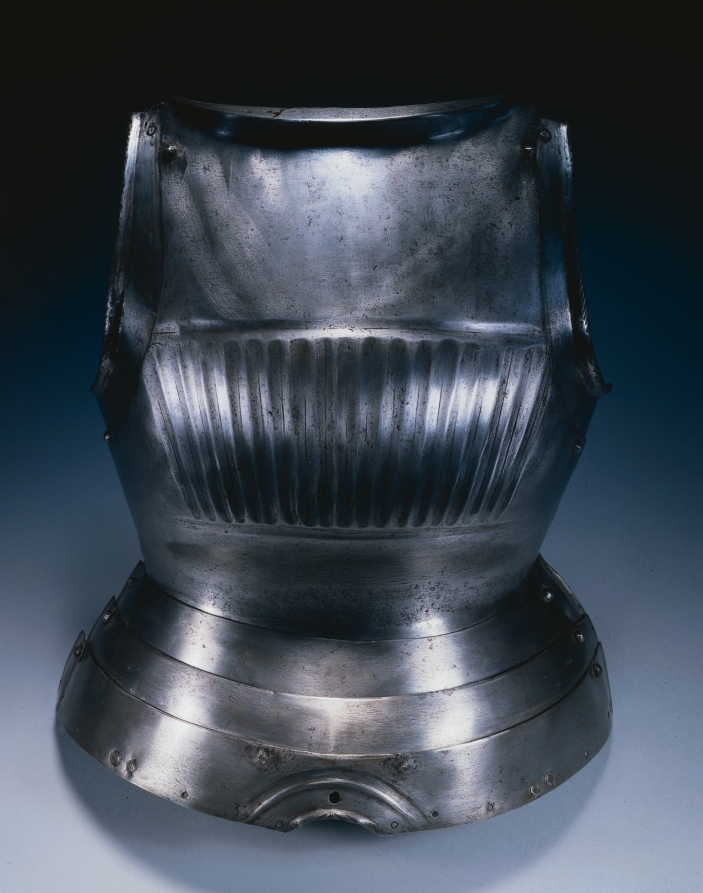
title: Breastplate in the Maximilian Style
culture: Germany, Nuremberg(?), early 16th century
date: c.1510–30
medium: steel, brass rivets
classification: Arms and Armor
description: Distinguished by its regularly fluted surfaces, armor in this style was popularized in South Germany during the early 1500s. The style is usually called "Maximilian," as it was introduced during the reign of Emperor Maximilian I (1493-1519). The style reflects male costume of the period and the shift to the new rounded forms of the Renaissance. Other examples of this armor style may be seen nearby.